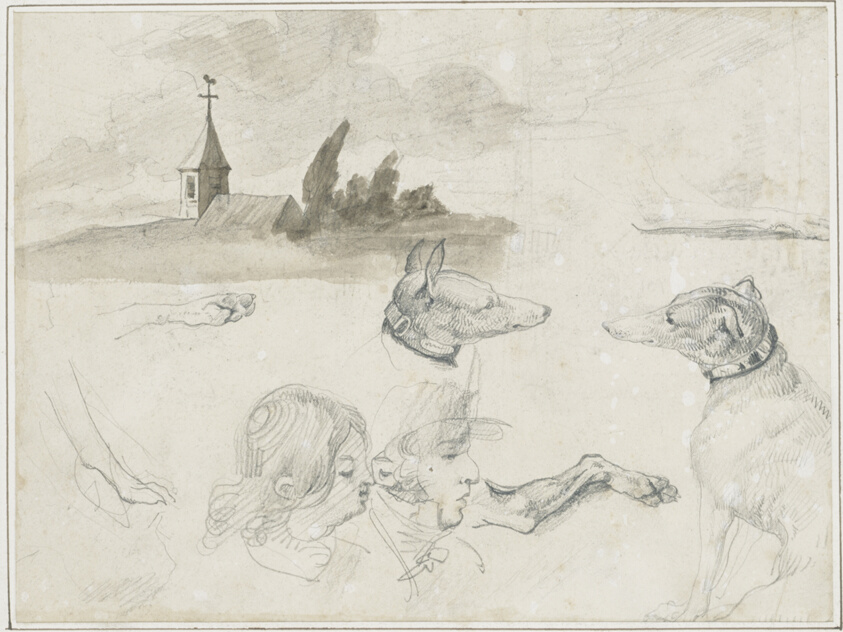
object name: Drawing and Watercolor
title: Sheet of Sketches: Greyhounds; A Male and a Female Head in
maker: Jean Louis André Théodore Géricault (French, 1791-1824)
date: 1813/14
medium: Graphite with brush and brown wash, on cream wove paper, perimeter mounted on ivory laid paper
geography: France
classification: graphite; drawings (visual works); prints and drawing